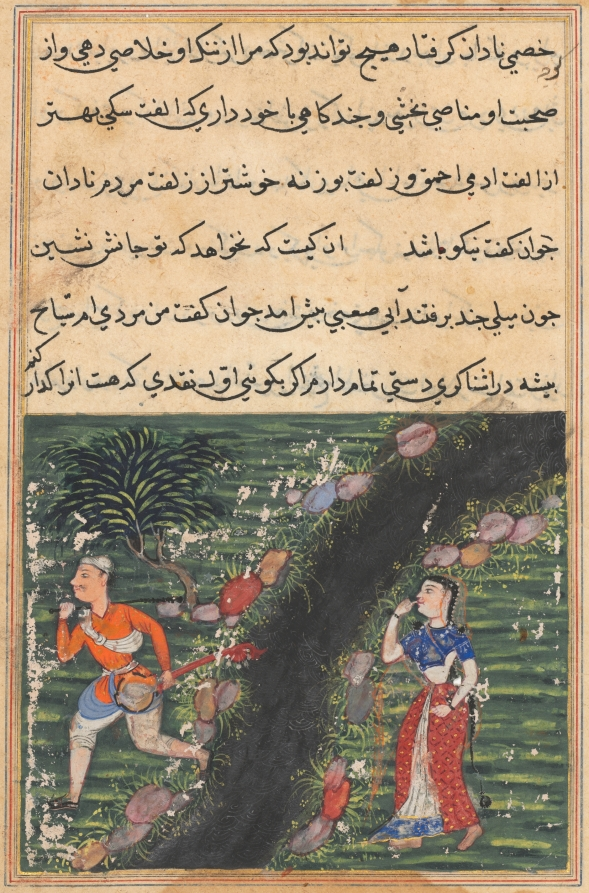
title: The vagabond crosses a stream with the possessions of the daughter-in-law of the king of Banaras and absconds, from a Tuti-nama (Tales of a Parrot): Sixteenth Night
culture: Mughal India, court of Akbar (reigned 1556–1605)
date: c. 1560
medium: gum tempera, ink, and gold on paper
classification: Painting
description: After agreeing to run away with the daughter-in-law of the king of Banaras, the destitute young man realizes that their relationship is unlikely to end happily. He leaves, taking her valuables with him. The woman, now alone on the other side of the stream, bereft of her jewelry, touches her index finger to her mouth in a gesture of shock.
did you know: The stream was painted in silver, which has tarnished.